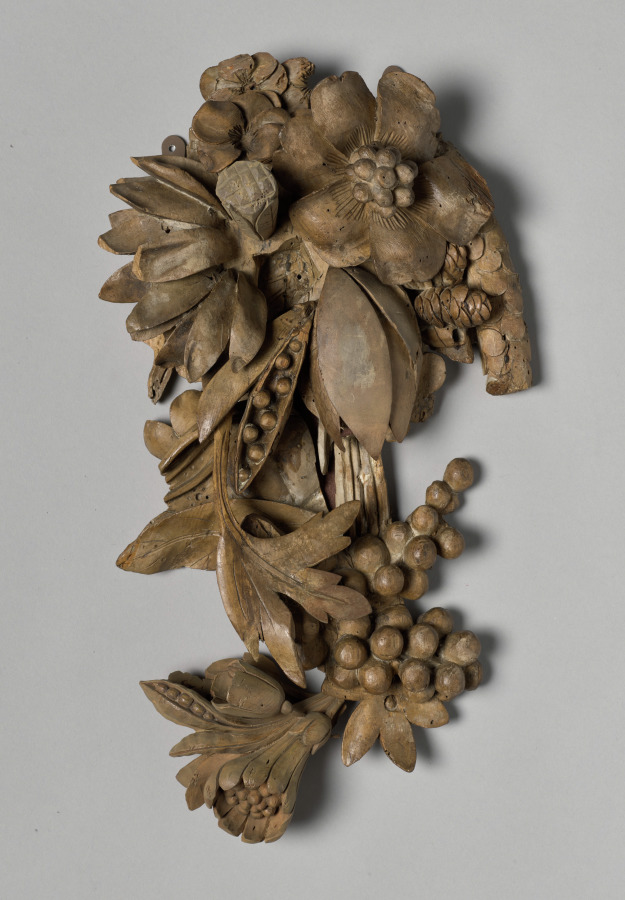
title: Carving from an Overmantel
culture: England, 17th century (Charles II)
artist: Grinling Gibbons (British, 1648–1721)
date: c. 1675–1677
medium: lindenwood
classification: Sculpture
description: The arrangement of architectural elements within grand interior spaces in the late 1600s and early 1700s emphasized symmetry and height. Decorative elements such as elaborately carved mantels, mirrors, paintings, and applied wall decorations were often stacked to achieve a visual focal point at one or both ends of the room. This particular overmantel decoration once hung above the fireplace in the Green Drawing Room of the Earl of Essex at Cassiobury in Watford, near London. In 1823, the British painter William Henry Hunt (1790–1864) produced a watercolor of the drawing room which featured this overmantel decoration. Grinling Gibbons was born in Rotterdam, the Netherlands, of English parents. After training there as an artist, he came to England in the 1660s and soon began to work as a sculptor of interior ornament, particularly in wood. One of his first large-scale decorative projects was the series of interiors at Cassiobury House.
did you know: The swags of fruit and foliage featured in this wooden overmantel decoration evoke the bounty of the English countryside.